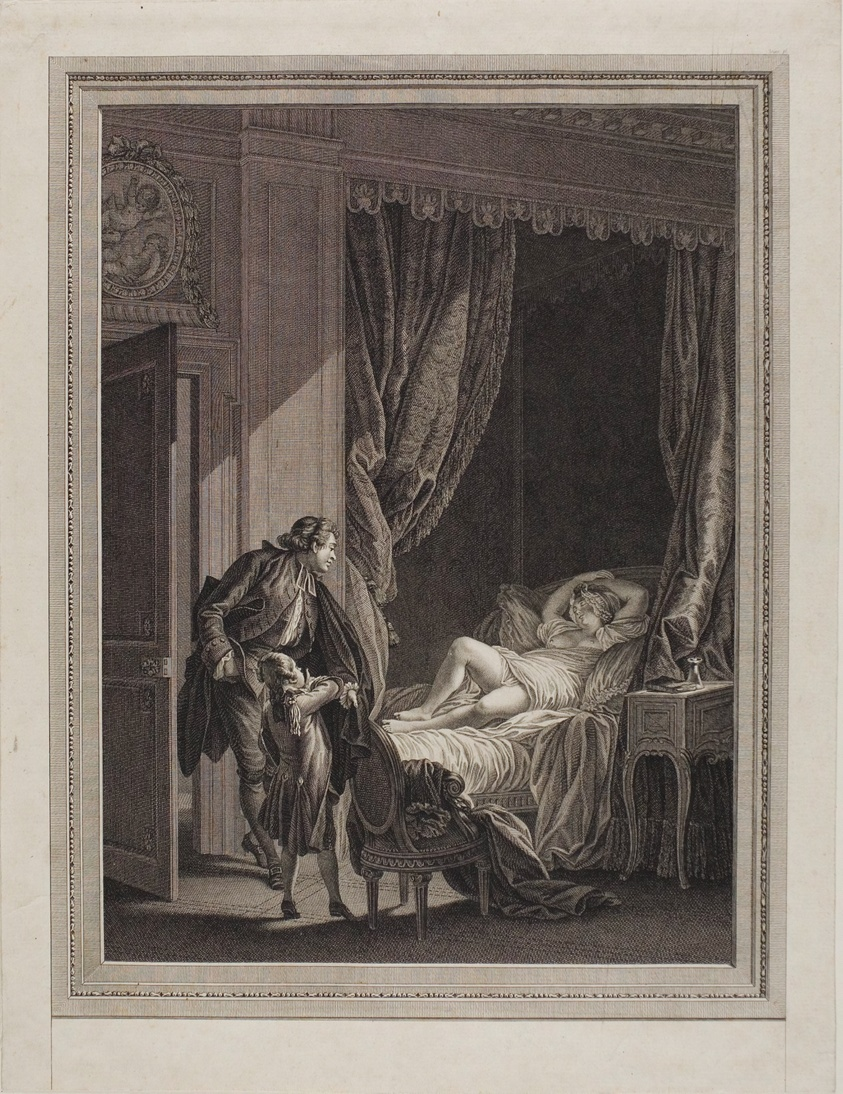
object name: Print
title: Morning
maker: Emmanuel Jean Nepomucene de Ghendt (French, 1738-1815); after Pierre Antoine Baudouin (French, 1723-1769)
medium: Etching on paper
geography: France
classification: etching; print; prints and drawing